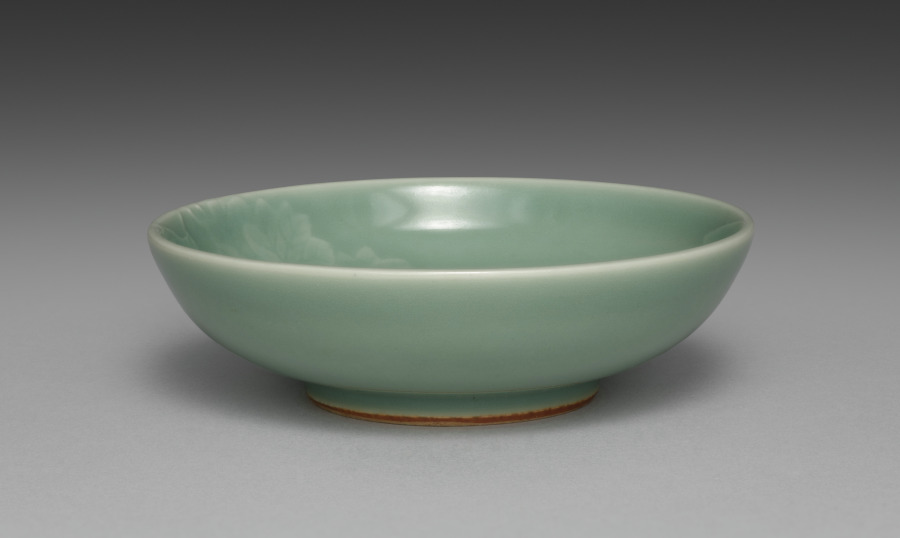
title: Dish from Dishes with Ivy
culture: Japan, Meiji period (1868–1912)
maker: Seifū Yohei III (Japanese, 1851–1914)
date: 1893–1914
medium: One from a set of five dishes; porcelain with green glaze and molded designs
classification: Ceramic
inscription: 清風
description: Yohei III’s main output for his sophisticated clientele was in the form of tea sets and dining sets. He often produced in pairs, sets of five, or sets of ten. This set of five dishes with a green glaze and designs of ivy vines in very low relief has unfortunately lost its box. These dishes are slightly larger than the other dishes, like CMA 2022.187, and so may have been not saucers but rather small plates for meals.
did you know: In his career, Seifū Yohei III created a range of dishes in green glazes.